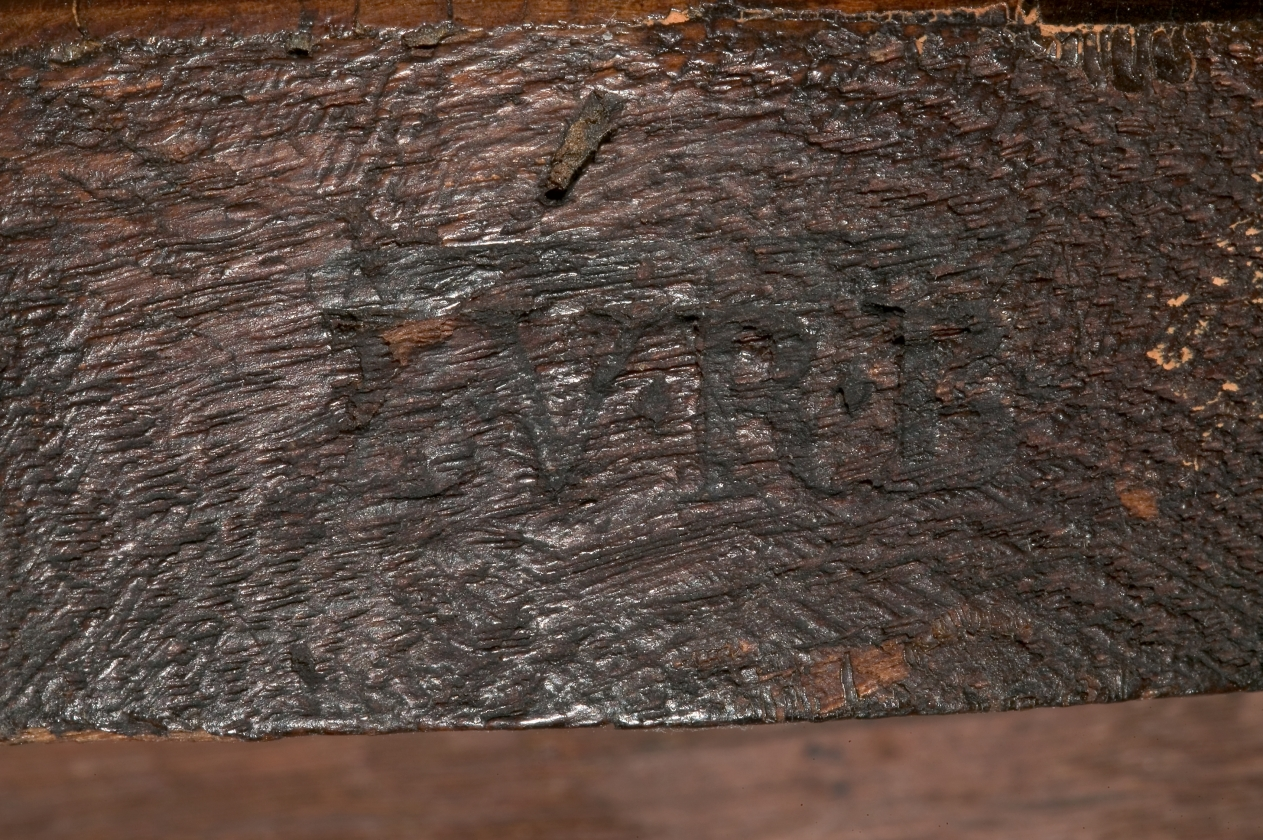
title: Table Desk (Bureau Plat)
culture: France, 18th century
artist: Bernard II van Riesen Burgh (Dutch, 1766)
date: c. 1750– 1760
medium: wood marquetry with gilt bronze mounts, leather top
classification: Furniture and woodwork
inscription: signed three times on bottom edge of apron: B. V. R. B.